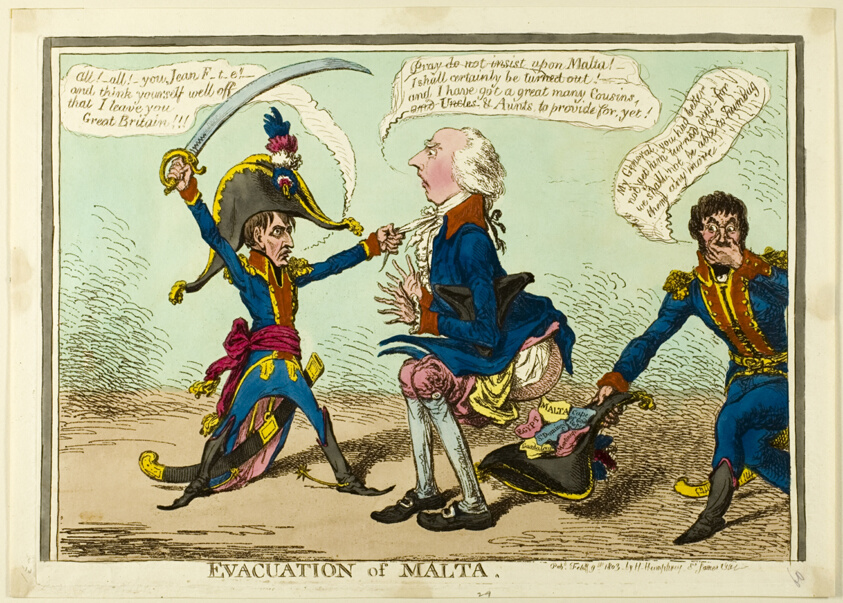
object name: Print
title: Evacuation of Malta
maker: James Gillray (British, 1756-1815); published by Hannah Humphrey (English, c. 1745-1818)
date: 1803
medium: Etching, with hand-coloring, on paper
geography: England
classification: etching; print; prints and drawing